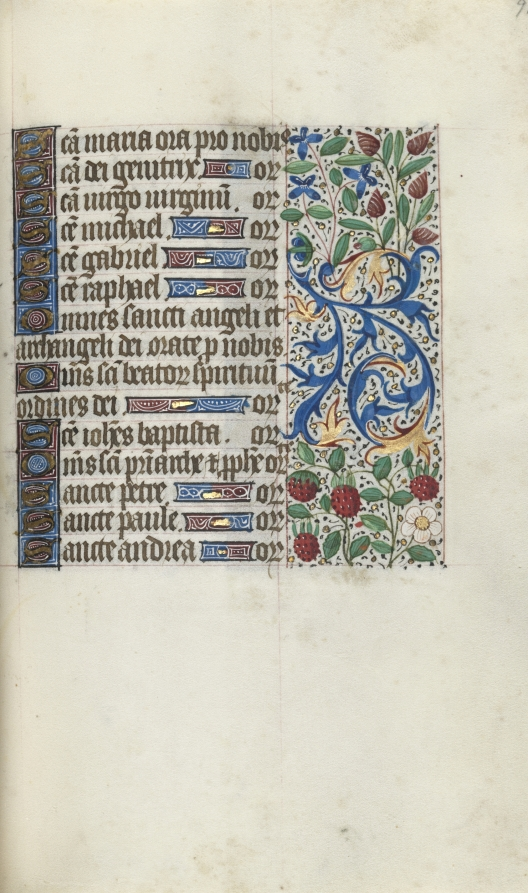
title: Book of Hours (Use of Rouen): fol. 93r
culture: France, Rouen, 15th century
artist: Master of the Geneva Latini (French, active Rouen, 1460–80)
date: c. 1470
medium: ink, tempera, and gold on vellum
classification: Bound Volume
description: In the late 1400s and early 1500s Rouen was an established and important center of book production. The city’s cathedral had a wealthy chapter that spent large sums of money to commission books and to maintain its extensive library. The stationers and booksellers would have likely been concentrated in or near the cathedral precinct. This artist, named after a manuscript now in Geneva, was Rouen’s principal illuminator during the second half of the 1400s.